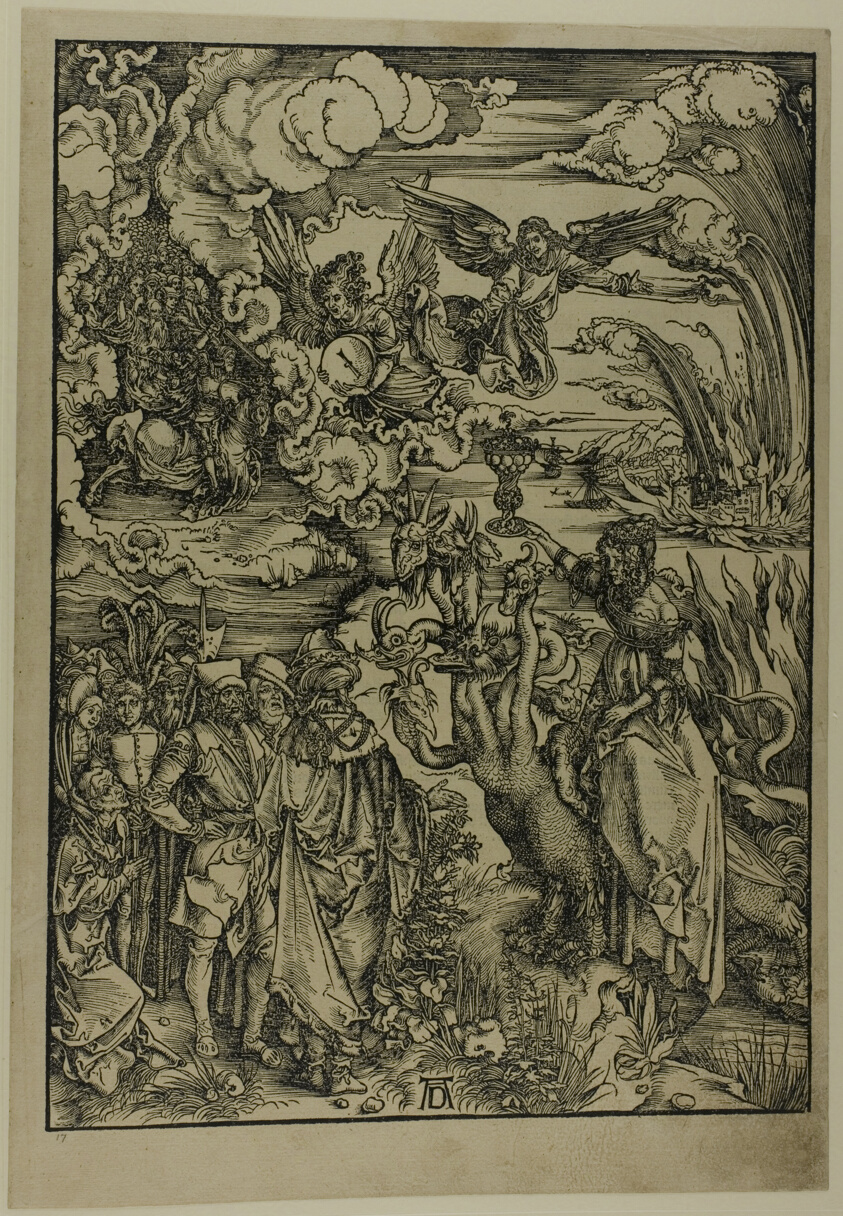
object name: Print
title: The Whore of Babylon, from The Apocalypse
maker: Albrecht Dürer (German, 1471-1528)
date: c. 1496–98, published 1511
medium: Woodcut in black on tan laid paper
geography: Germany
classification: woodcut; print; prints and drawing; paper